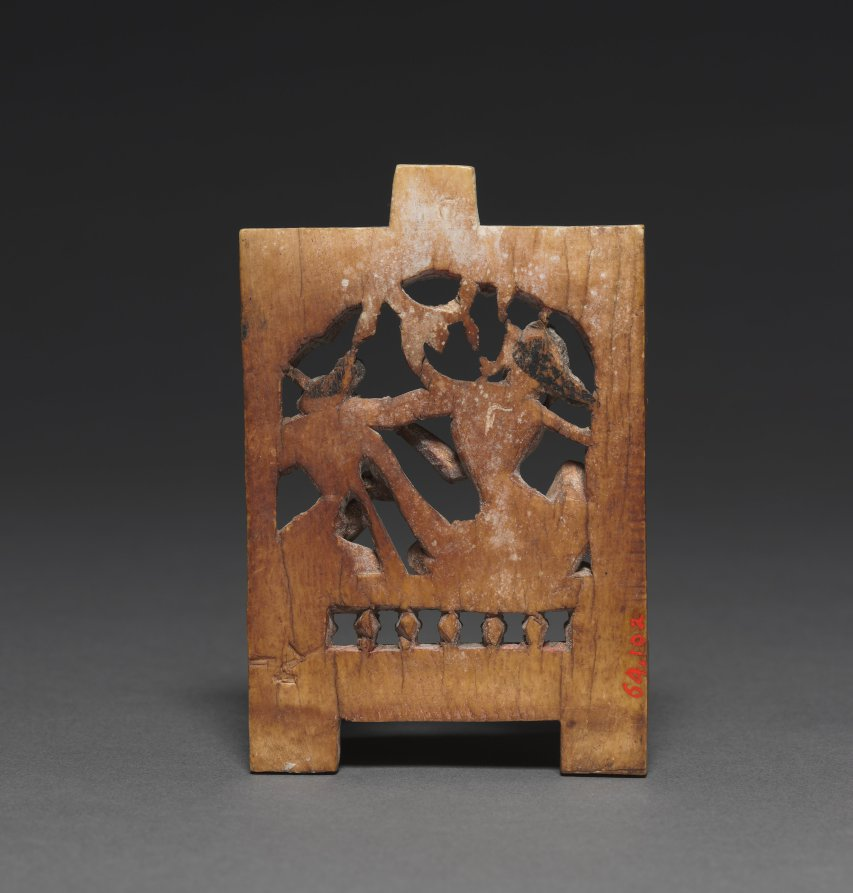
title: Mithuna (Loving Couple)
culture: India, Orissa, early 14th Century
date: c. 1300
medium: ivory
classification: Ivory